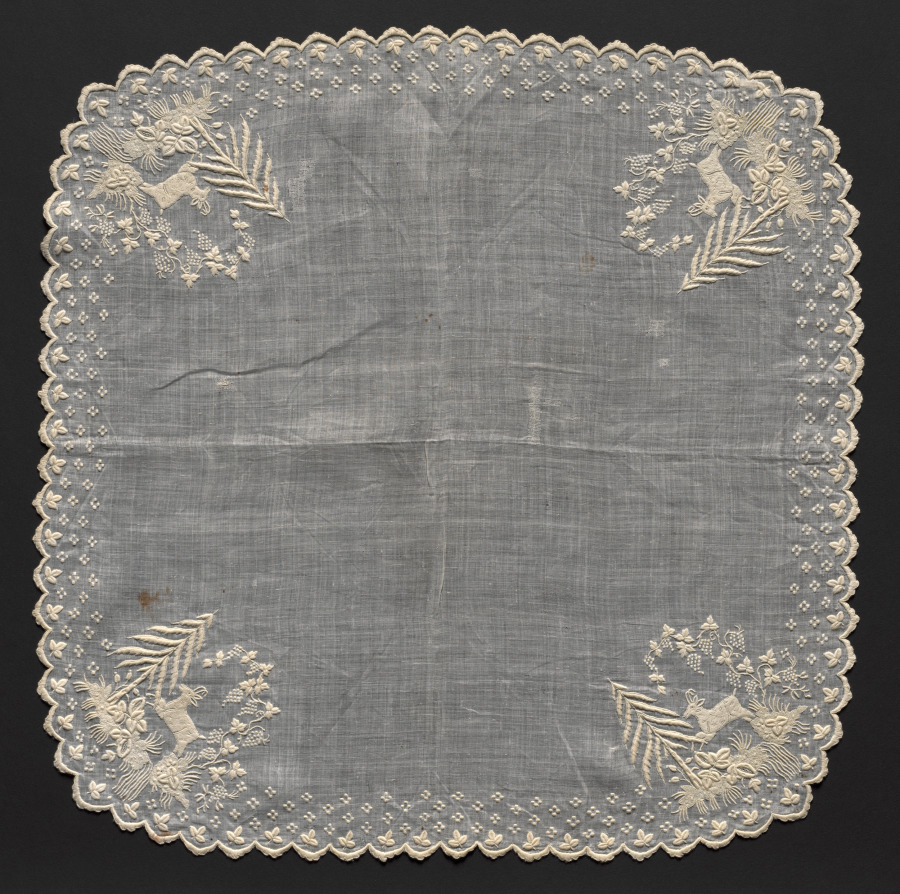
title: Handkerchief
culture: Switzerland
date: 1800s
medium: Plain weave linen: embroidered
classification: Embroidery